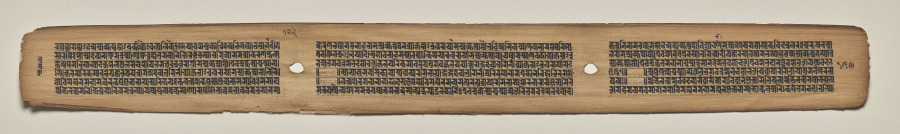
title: Text, Folio 129 (verso), from a Manuscript of the Perfection of Wisdom in Eight Thousand Lines (Ashtasahasrika Prajnaparamita-sutra)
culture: Eastern India, Bihar, Vikramashila Monastery. Painting: Nepal, Kathmandu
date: Sunday, September 14, 1119 (year 239 of the Newar Samvat in the month of Ashvina)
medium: gum tempera and ink on palm leaves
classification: Painting